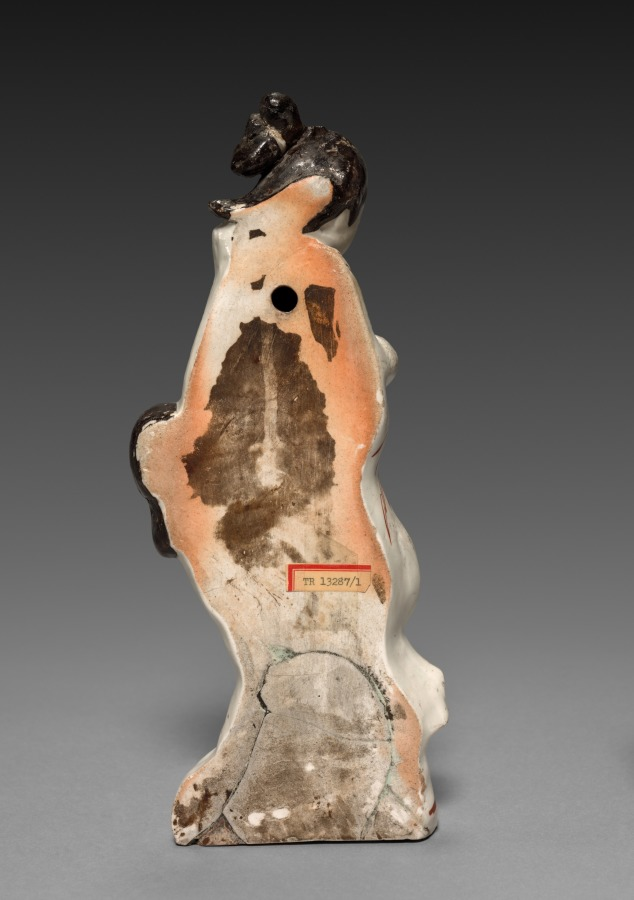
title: Standing Figure of a Beauty: Arita Ware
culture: Japan, Edo period (1615–1868)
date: 1600s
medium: porcelain with overglaze enamel decoration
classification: Ceramic